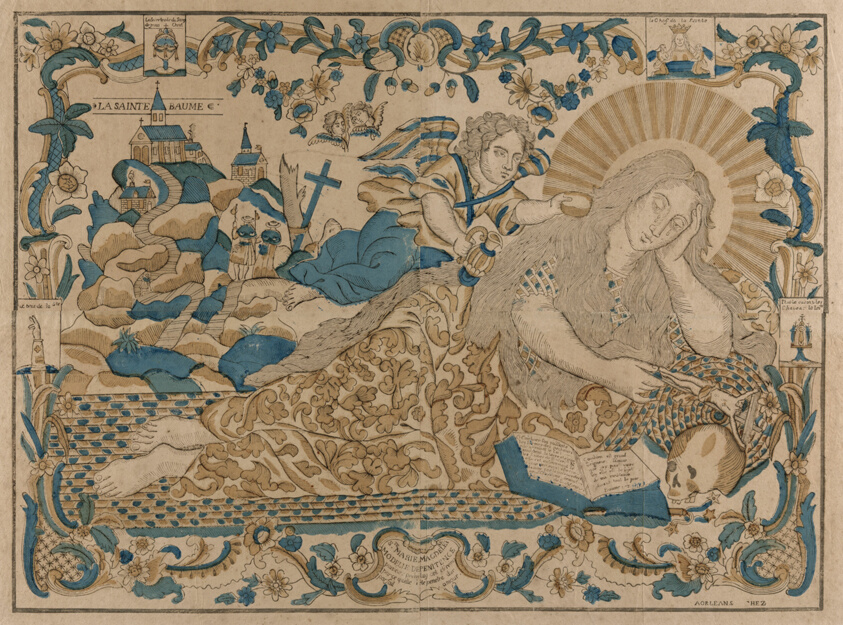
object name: Print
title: Saint Mary Magdalene, Model of Penitence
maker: Unknown Artist (French, 18th century); published by Pierre-Fiacre Perdoux (French, c. 1771–1824)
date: 1774/89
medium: Woodcut in black, hand-colored with brush, stencil and watercolor, on four sheets of cream laid paper (discolored to buff), joined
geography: France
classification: woodcut; print; prints and drawing